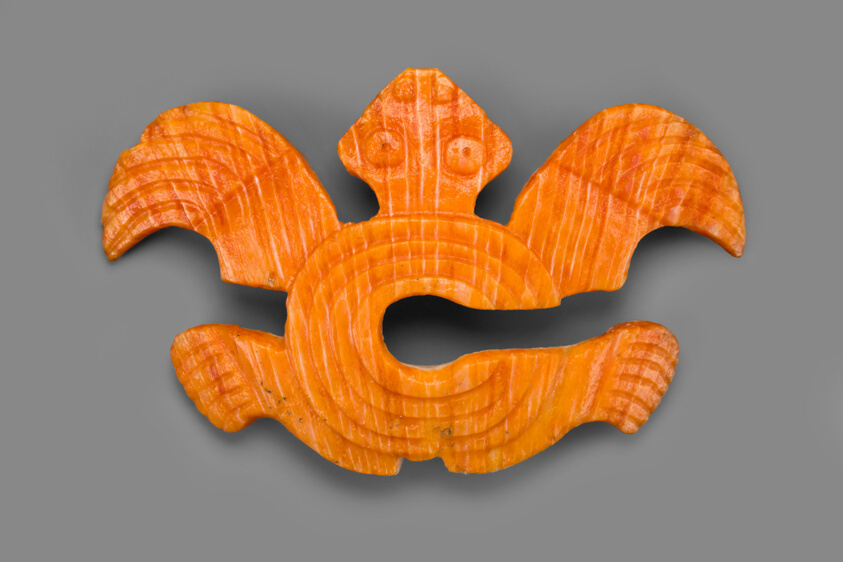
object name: Costume and Accessories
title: Nose Ornament in the Form of a Turtle with C-shaped Body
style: coclé, Pre-Columbian, americas, lower central america, Arts of the Americas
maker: Coclé (Venado Beach, Coclé province, Panama)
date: 800–1200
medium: Spondylus shell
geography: Venado Beach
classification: jewelry; shell; art of the americas; costume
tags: turtle, animals